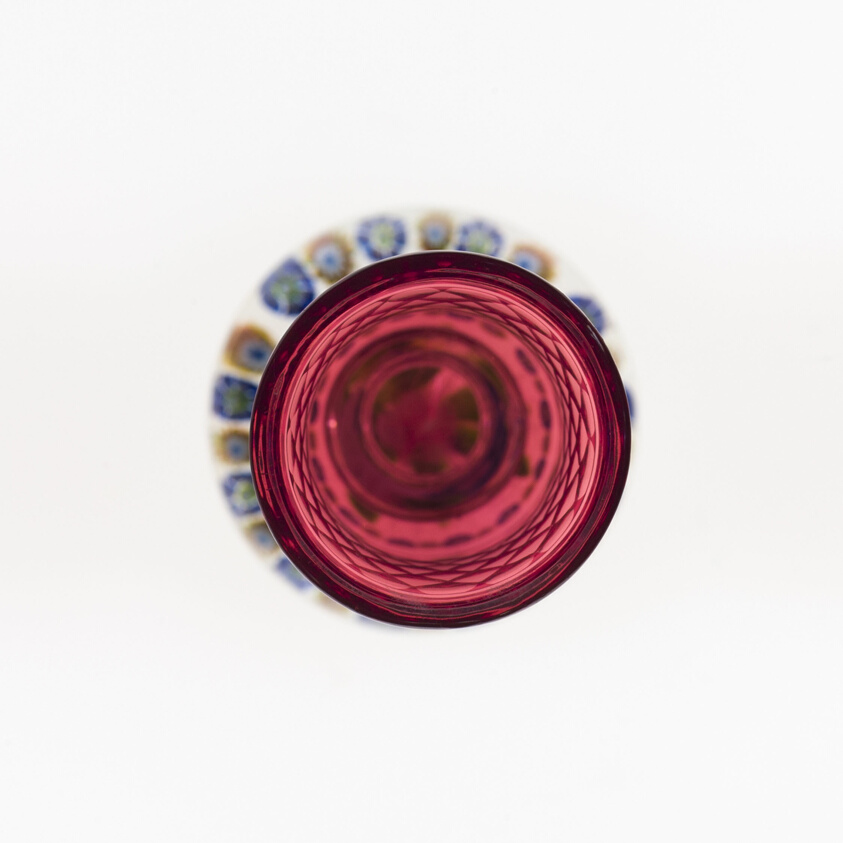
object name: Glass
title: Vase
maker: Saint-Louis Glassworks (Cristalleries de Saint-Louis); Lorraine, France, founded 1586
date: c. 1845–60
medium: Glass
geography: Saint-Louis-lès-Bitche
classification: paperweight; glass